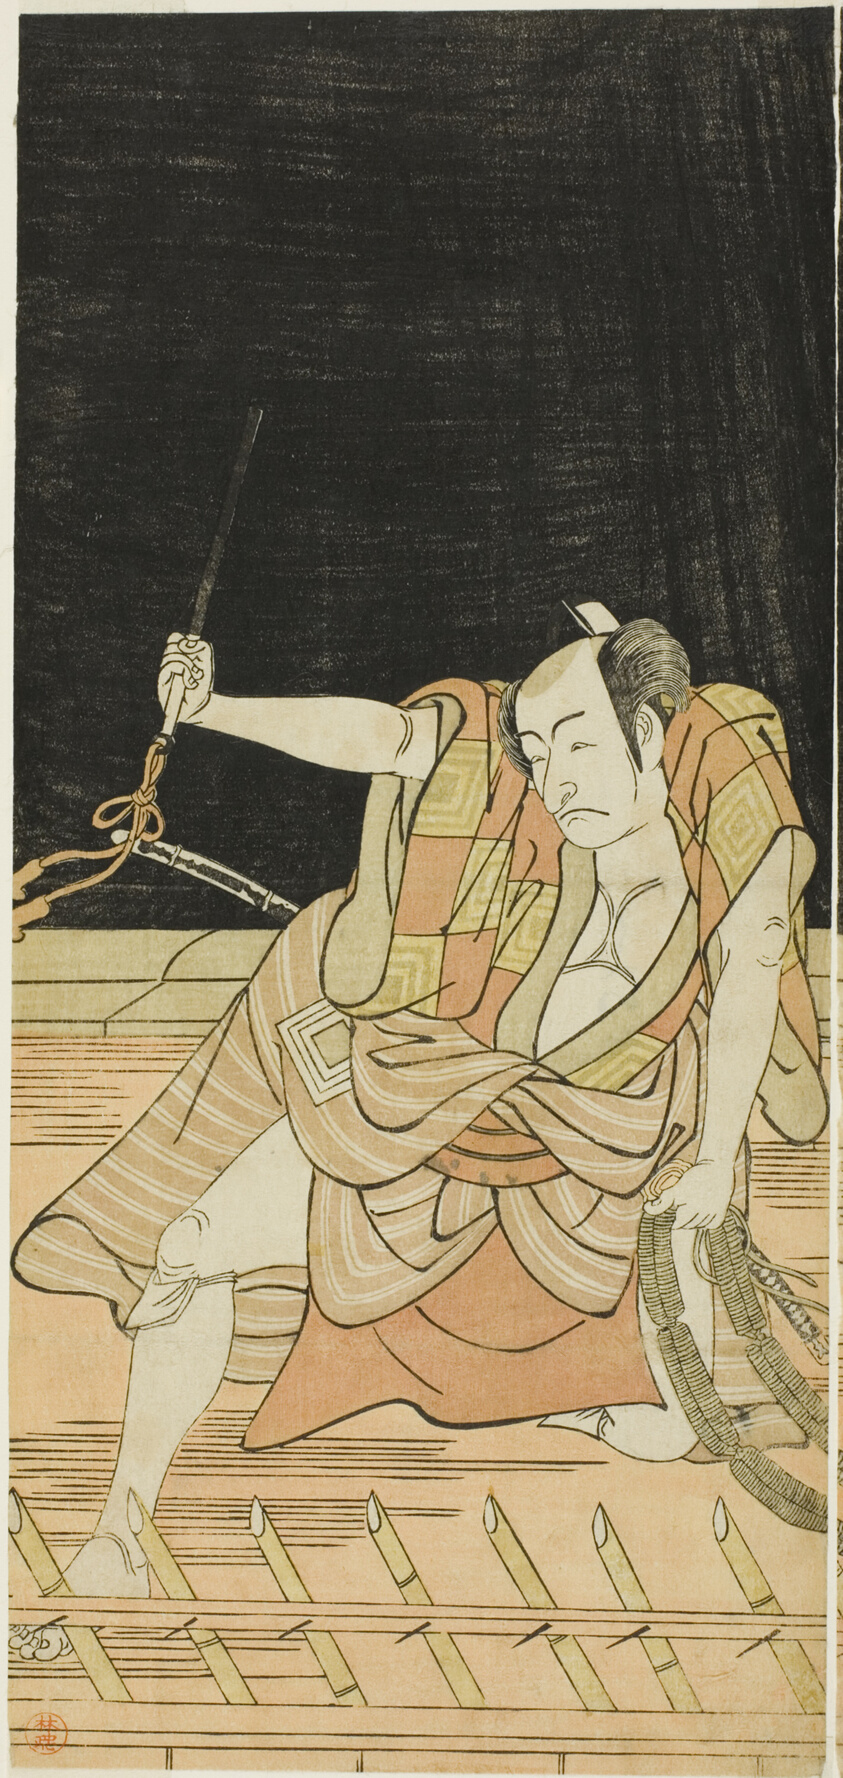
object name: Print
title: Actors Nakamura Nakazô I as Danshichi Kurobei and Ichikawa Danjûrô V as Issun Tokubei in “Mirror of Osaka in the SummerFestival” (“Natsu MatsuriNaniwa Kagami”)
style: Japanese (culture or style)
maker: Katsukawa Shunkô; Japanese, 1743–1812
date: About 1779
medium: Color woodblock prints; hosoban diptych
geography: Japan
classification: woodblock print; print; asian art